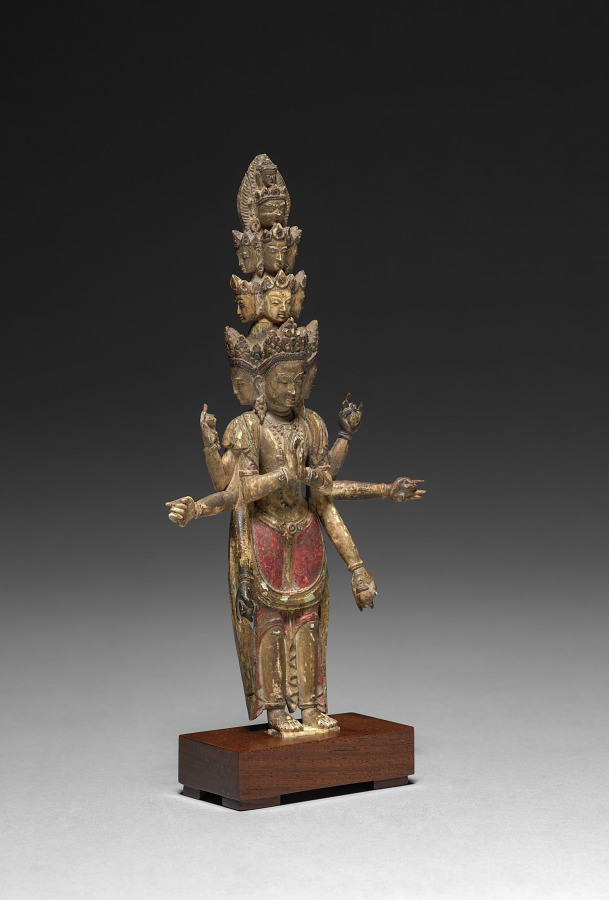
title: Eleven-Headed Avalokitesvara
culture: Nepal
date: 1500s–1600s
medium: painted ivory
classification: Ivory